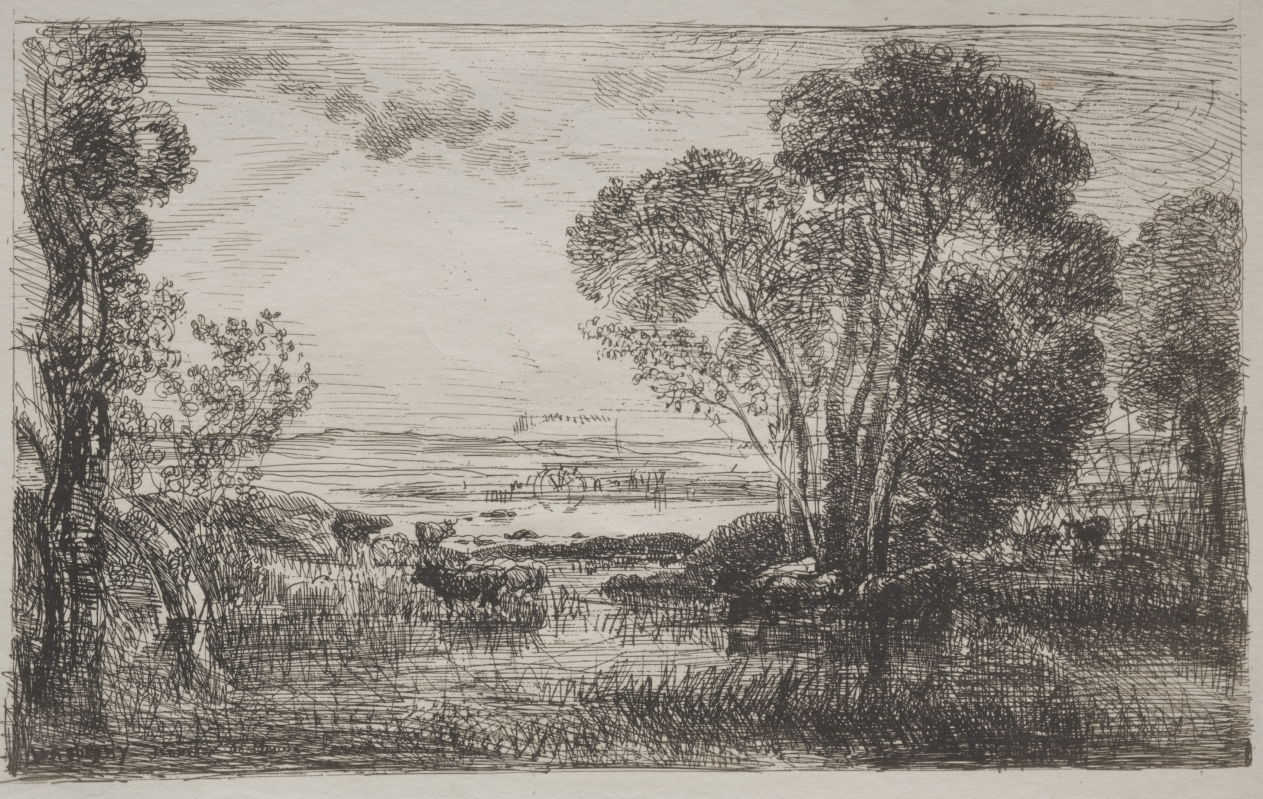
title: The Hydraulic Machine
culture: France, 19th century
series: This subject was also engraved on wood by an anonymous artist, and was published with the title"L'Automne des Bords du Morvan" and published in "Monde illustré" Oct. 1868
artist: Charles François Daubigny (French, 1817–1878)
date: original impression 1862, printed in 1921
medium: cliché-verre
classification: Print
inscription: signed, lower left, in plate: Daubigny